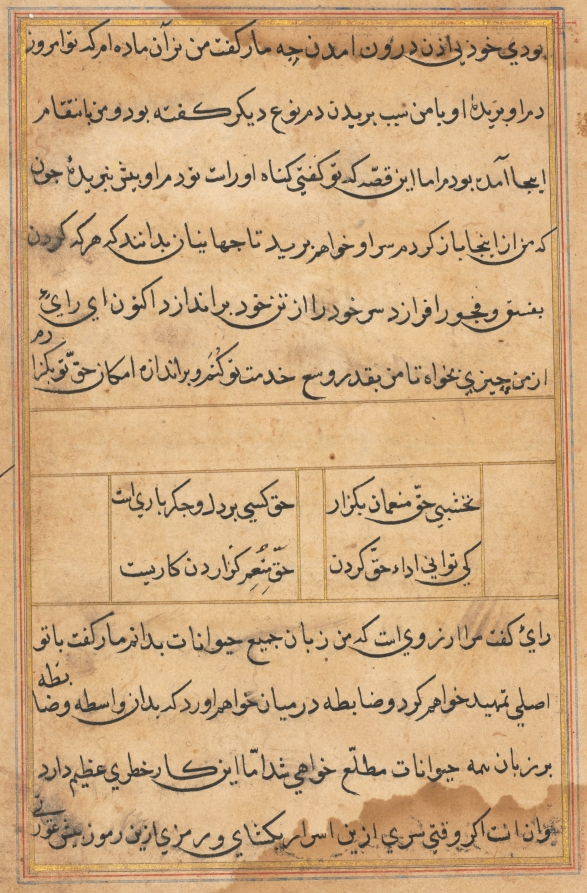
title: Page from Tales of a Parrot (Tuti-nama): text page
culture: Mughal India, court of Akbar (reigned 1556–1605)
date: c. 1560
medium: gum tempera, ink, and gold on paper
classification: Painting